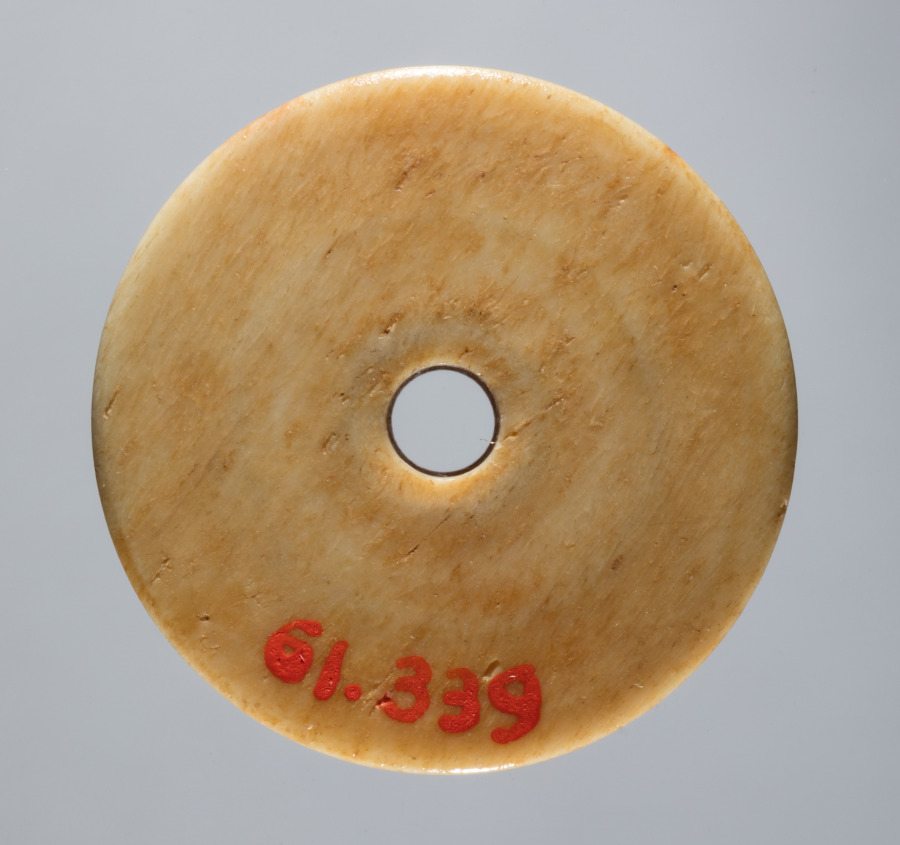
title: Spindle Whorl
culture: Iran, early Islamic period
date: 700s - 900s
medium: bone, incised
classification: Spindle Whorl